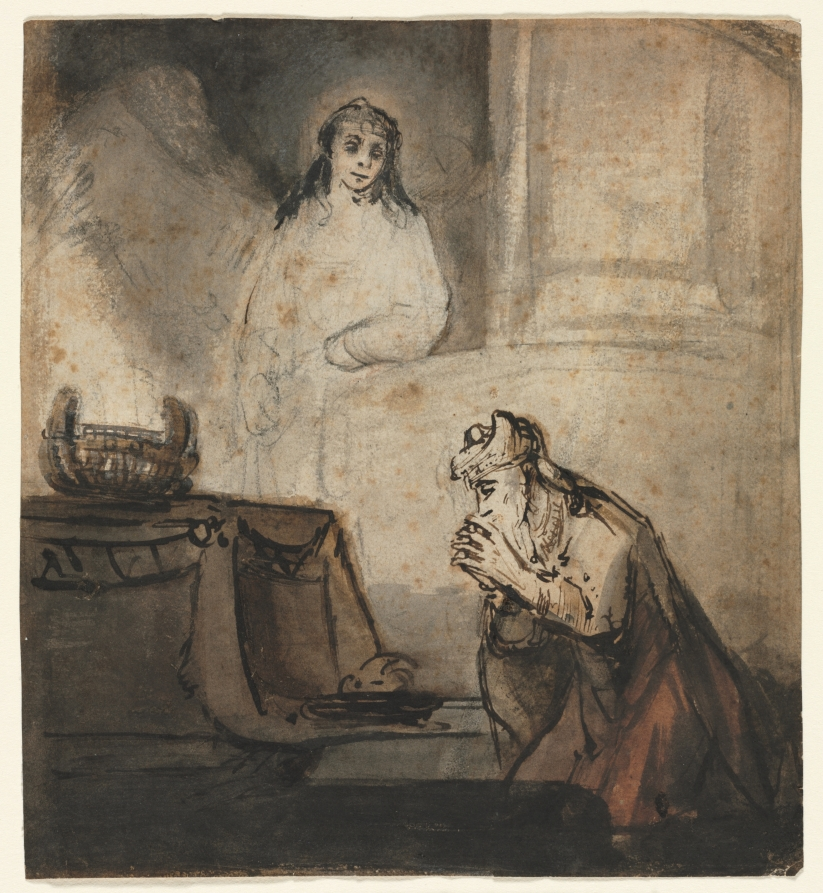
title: Angel Appearing to Zacharias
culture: Netherlands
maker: Barent Fabritius (Dutch, 1624-1673)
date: 1650–75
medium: reed pen and brown and black ink and brush and brown, gray, and red wash, over black chalk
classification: Drawing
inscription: VERSO, center, in brown ink: 4 ; lower left, in graphite(?): [illegible, erased] ; lower left, in graphite: 1132 ; lower right, in graphite: 26 ; lower right, in red chalk strengthened with graphite: no 4